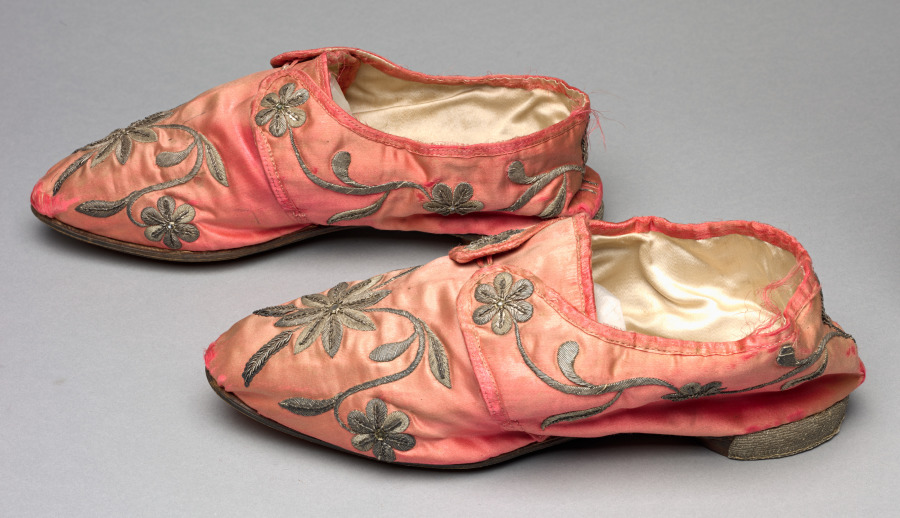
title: Pair of Slippers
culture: Italy, Venice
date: early 1700s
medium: Silk: satin weave with silver metal thread embroidery and trim; spangles; leather soles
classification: Garment